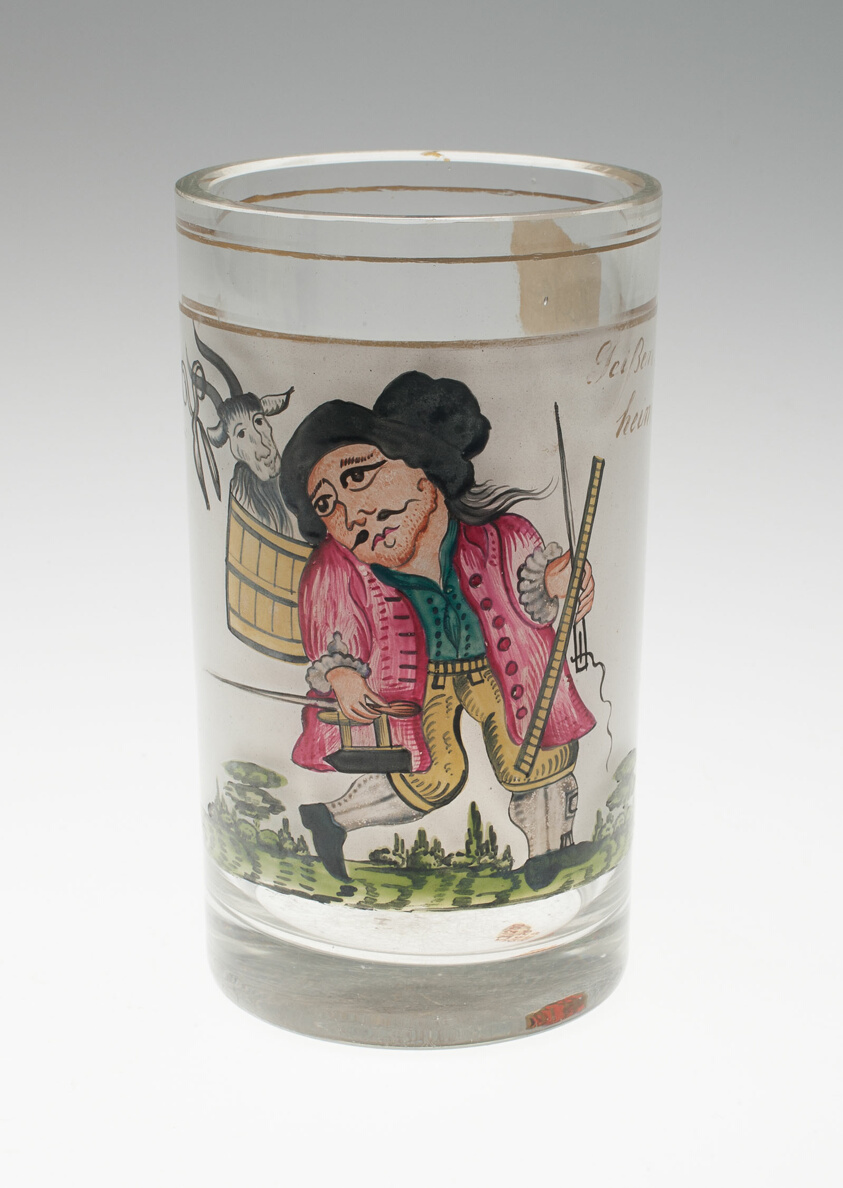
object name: Glass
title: Beaker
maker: Germany, Hessen, Geisenheim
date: c. 1850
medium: Glass; colorless, blown, stained and gilded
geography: Germany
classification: drinking vessel; glass; european decorative arts